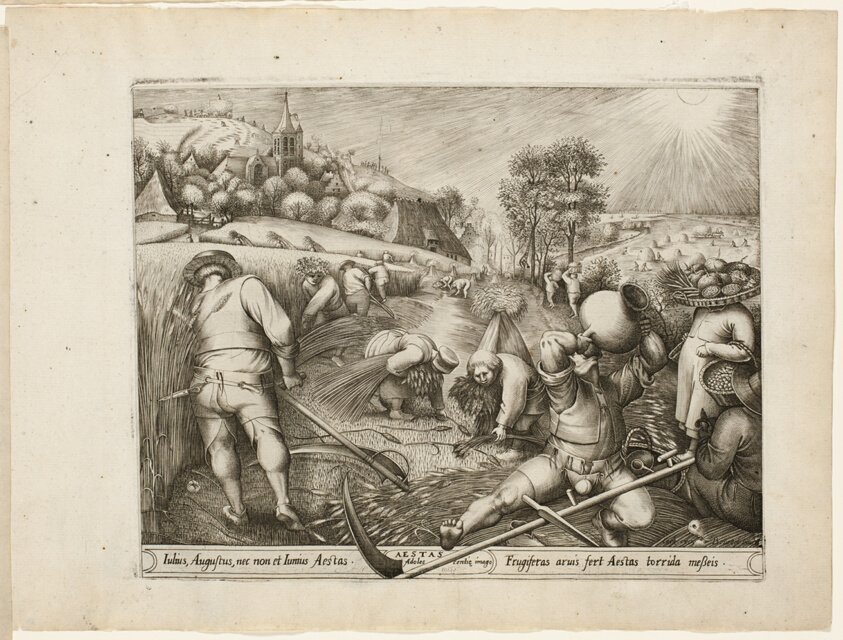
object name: Print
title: Summer, from The Four Seasons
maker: Pieter van der Heyden (Flemish, c. 1530–after 1584); after Pieter Bruegel, the elder (Flemish, 1525/30–1569); published by Hieronymus Cock (Flemish, c. 1510–1570)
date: 1570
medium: Engraving with etching in black on ivory laid paper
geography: Flanders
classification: engraving; paper; print; prints and drawing